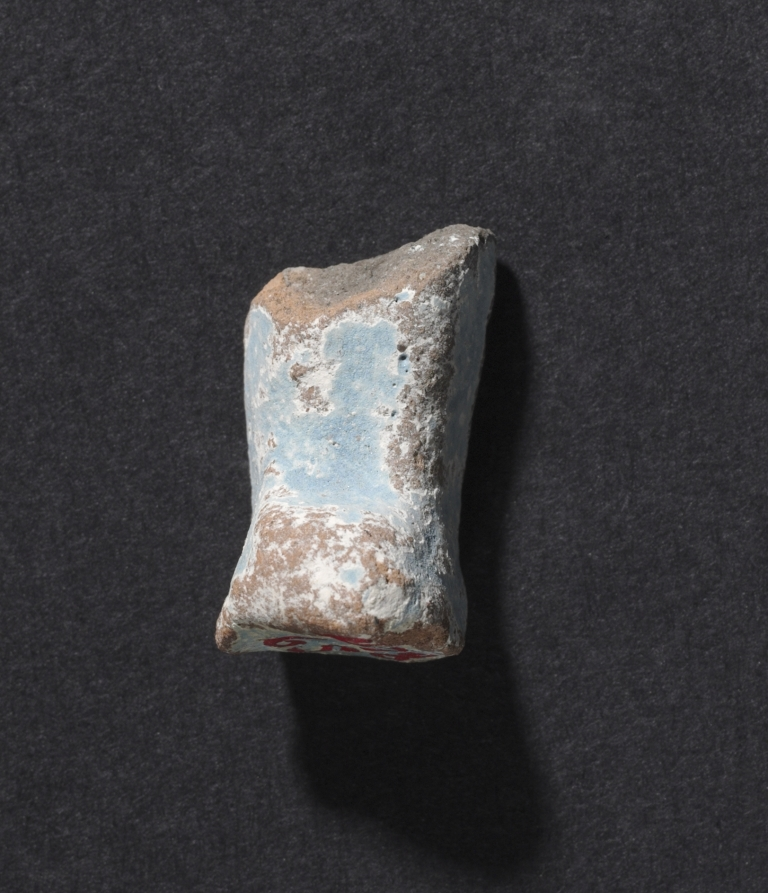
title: Shawabty of Ditamenpaankh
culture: Egypt, Late period (715–332 BCE), Dynasty 25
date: 715–656 BCE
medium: terracotta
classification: Funerary Equipment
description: High demand for shawabtys in the Late Period, a time when as many as 400 or more shawabtys were placed in the tomb with the deceased, gave rise to a specialized container for storing them: the shawabty box. This example is inscribed for the lady of the house, Ditamenpaankh, and was probably one of a pair originally made for her. The single-masted boat on the box's lid is perhaps an allusion to the pilgrimage of the deceased to the holy city of Abydos, the cult city of Osiris, king of the dead. The shawabtys inside are crude, mass-produced examples cast in an open mold. Made of terracotta, their blue paint imitates more costly shawabtys made of faience. As for the shawabty spell, it has been removed from its traditional location on the shawabty's front and relocated onto the sides of box, where it needed only to be written once, thus expediting production.